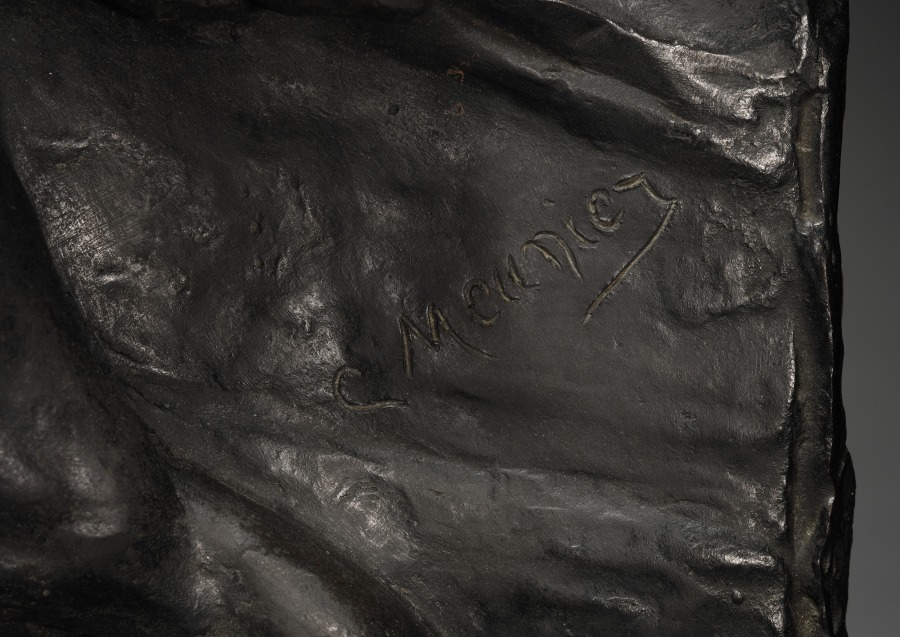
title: The Soil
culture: Belgium, 19th century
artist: Constantin Meunier (Belgian, 1831–1905)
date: c. 1890 – 1900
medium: bronze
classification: Sculpture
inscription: Signed right: "C. Meunier"; inscribed lower right front: "B. Verbeyot, Fondeur, Bruxelles."; lower left: "GLEBE"